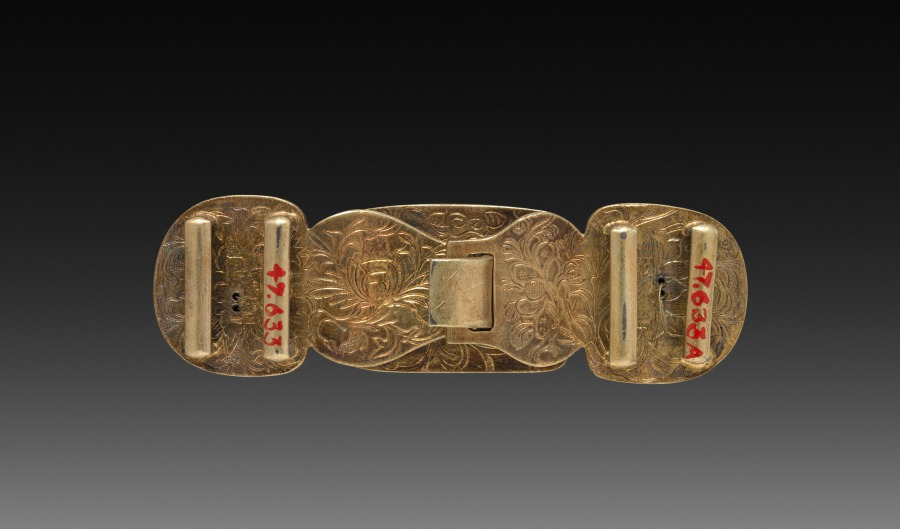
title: Buckle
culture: China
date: 1900s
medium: gilt brass, engraved and set with green jade and rose quartz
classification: Jewelry